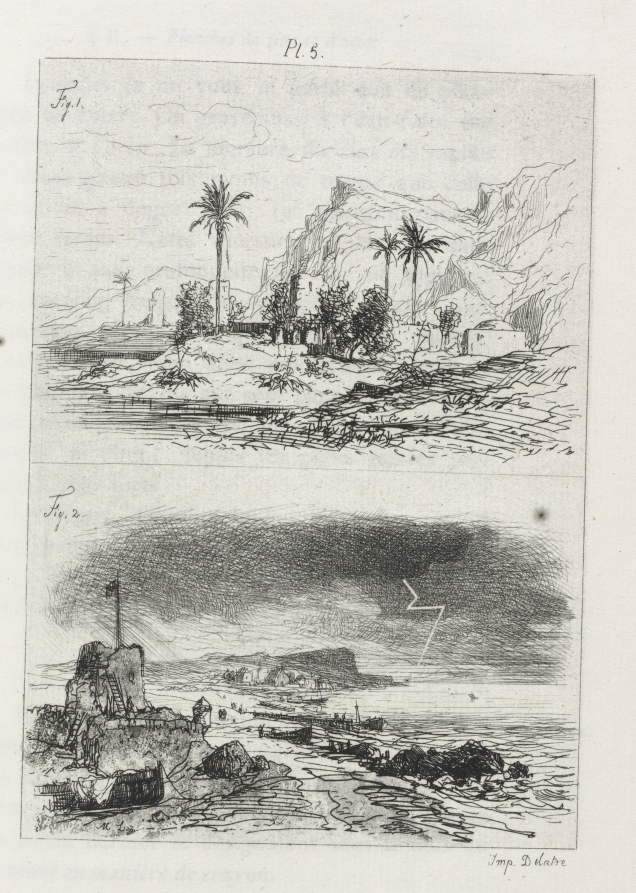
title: Traité de La Gravure a l’eau forte: Plate 5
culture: France, 19th century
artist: Maxime Lalanne (French, 1827–1886)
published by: Cadar and Luquet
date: 1866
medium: etching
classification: Bound Volume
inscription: on first page, in pencil: "J. H. Maghee 1874"